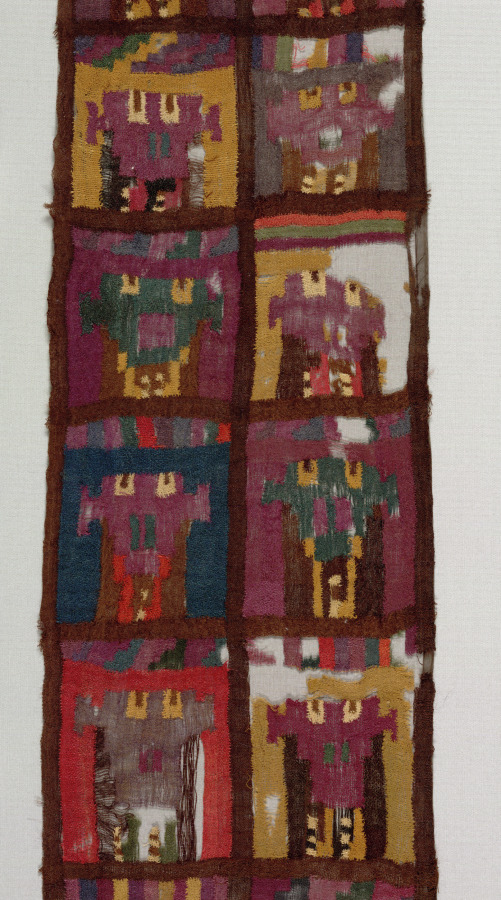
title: Band with Trophy Heads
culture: Peru, South Coast, Nasca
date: 100 BCE–700 CE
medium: interlocking warp and weft, single interlock: wool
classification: Textile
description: This band, remarkable for its intense color and spider-web sheerness, was created using an unusual technique known as discontinuous warp and weft. That is, none of the vertical or horizontal yarns are continuous from one side of the band to the other. Rather, they travel back and forth within their own color areas, linking at the edges with yarns in adjacent areas. This is a difficult feat when weaving on a loom and the creator likely used another approach, such as darning with a needle over a ground cloth that was then removed. The image repeated in each of the band’s rectangles is a head supported on two little feet.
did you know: This band is made in with a weaving technique that is unique to the ancient Andes.